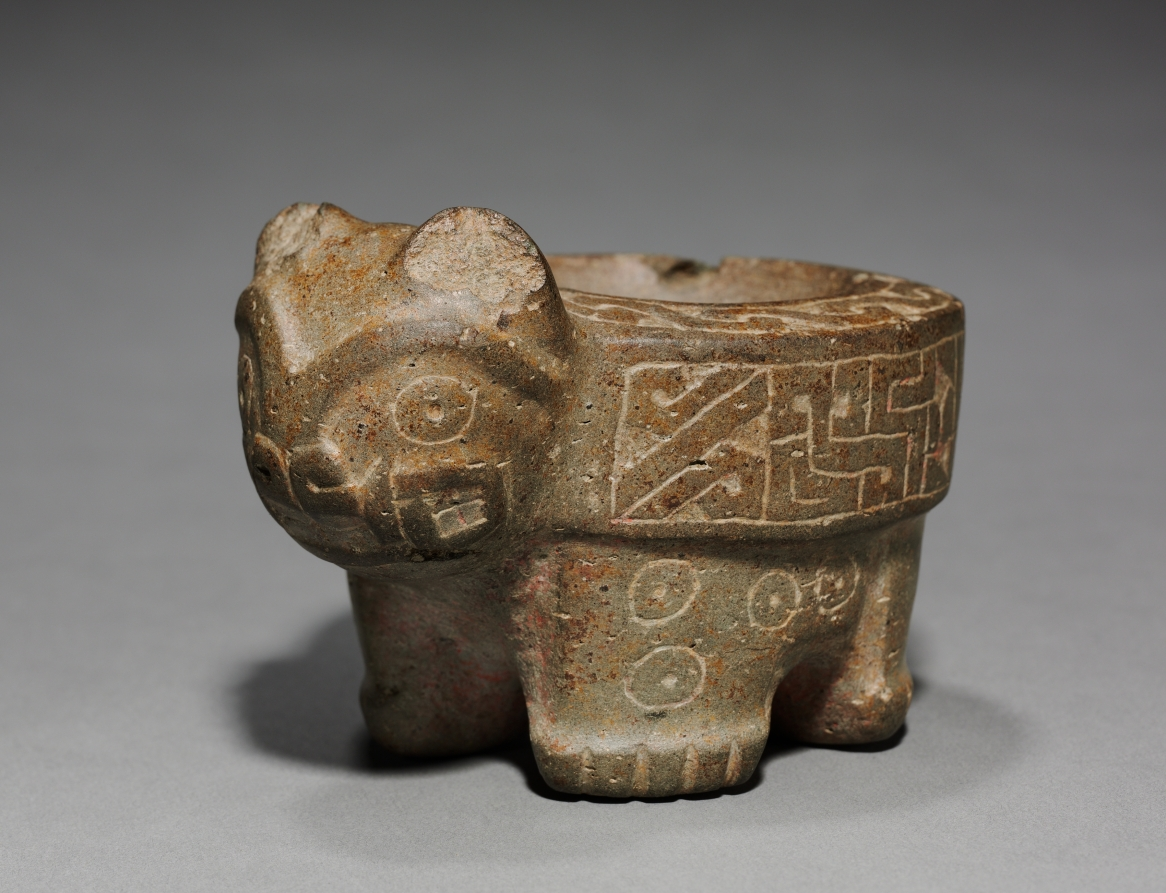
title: Feline Mortar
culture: Peru, North Highlands, Pacopampa(?), Chavín style (900-200 BCE)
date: 700–1 BCE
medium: stone, pigment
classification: Stone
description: Size suggests that this Chavín-style mortar was not used to grind bulky staples like corn, but instead pigments or plant hallucinogens used in religious rites to achieve spiritual insight and communion with cosmic forces. This may come from Pacopampa, a site in the northern highlands where elites adopted Chavín deities and worshiped them alongside local deities. These small sculptures illustrate the appeal and the spread of Chavín religion.